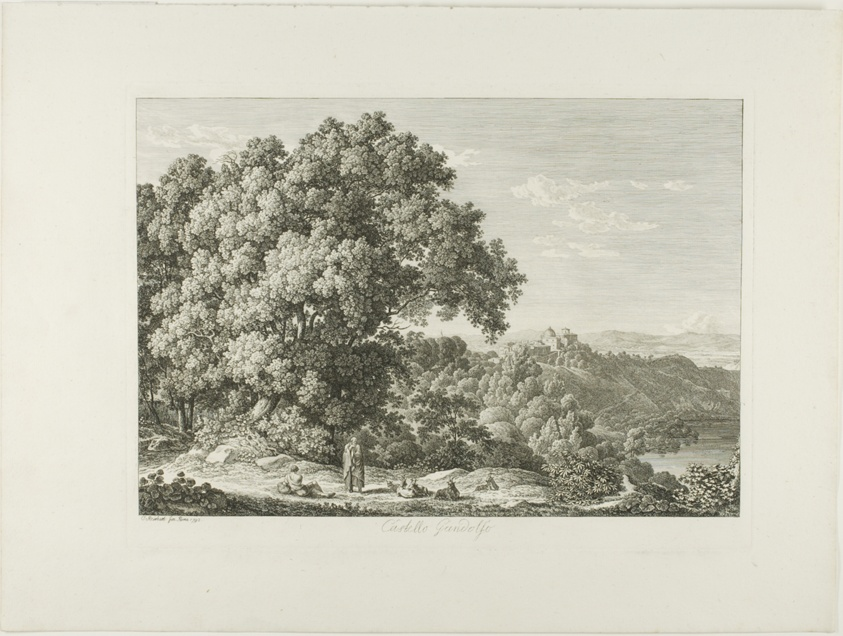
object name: Print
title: Castle Gandolfo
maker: Johann Christian Reinhart (German, 1761-1847)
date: 1792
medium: Etching on ivory laid paper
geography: Germany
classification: etching; prints and drawing; print